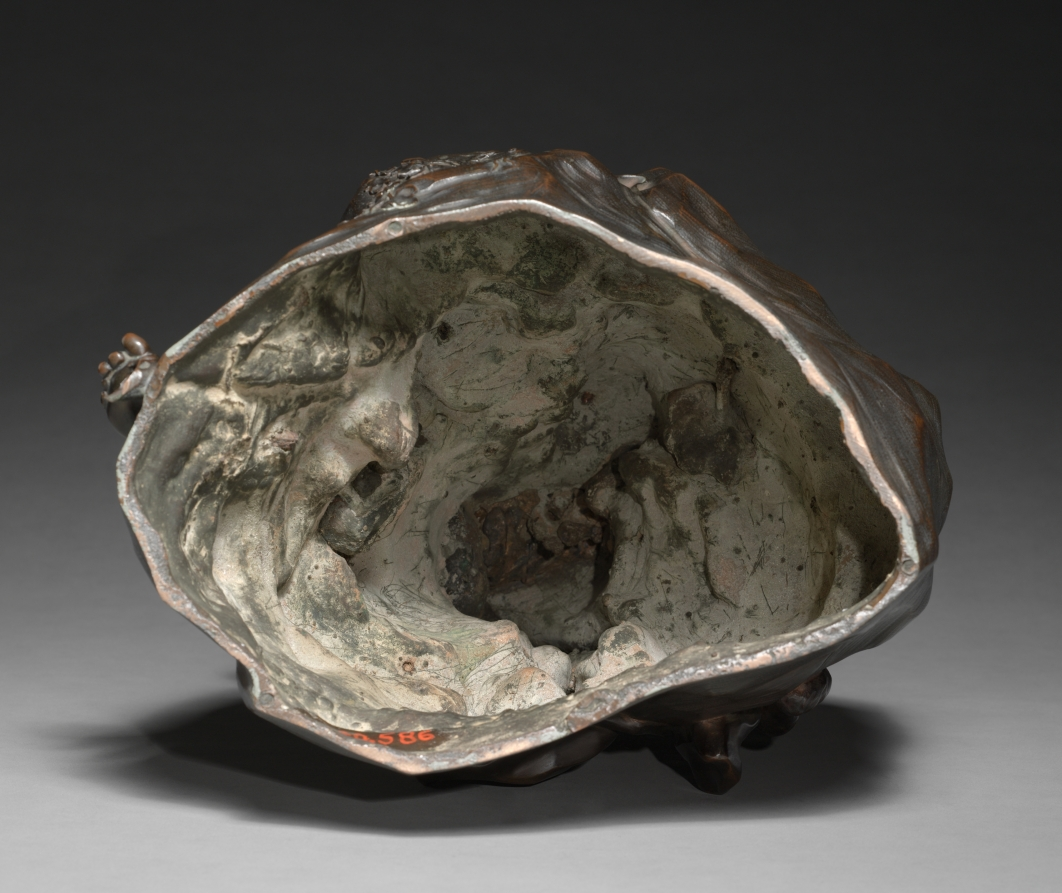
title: Young Saint John and the Lamb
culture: Italy, Florence, 17th century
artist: probably by Giuseppe Piamontini (Italian, 1664–1742)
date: c. 1680–1700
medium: bronze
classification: Sculpture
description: John the Baptist is often accompanied by a lamb as a sign of his intimacy with Christ, the Lamb of God. The depiction of children embracing animals is a motif from antiquity that Piamontini would have known.